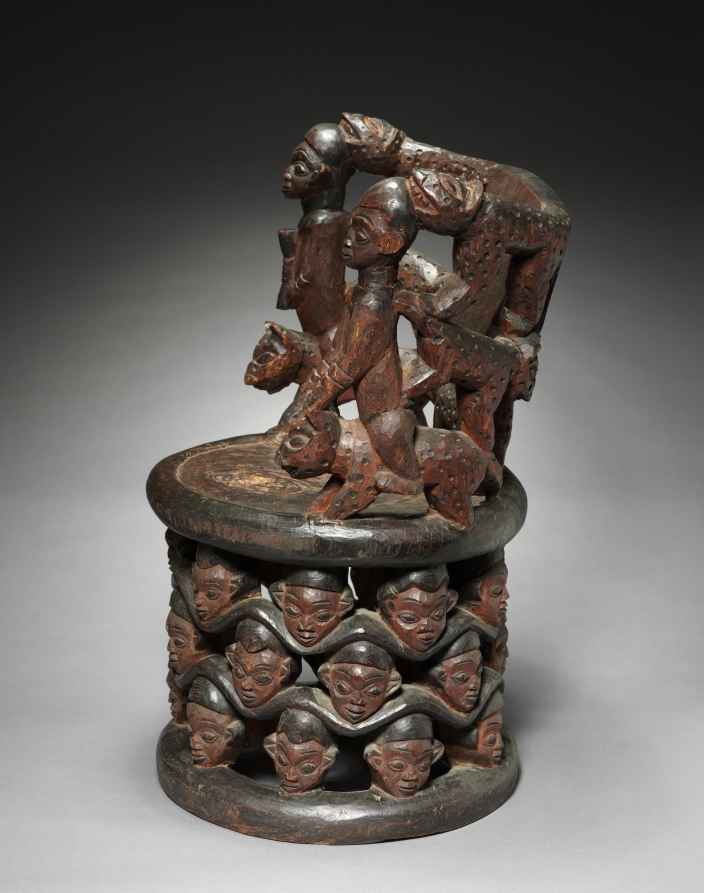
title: Prestige Chair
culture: Africa, Central Africa, Cameroon, Babanki-style maker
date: 1800s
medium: Wood and paint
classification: Furniture and woodwork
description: This stately chair attributed to the Babanki peoples of the Cameroon Grassfields features an unusual configuration of male and female figures. They are mounted on stylized leopards, animals revered as embodiments of power and royalty, which stand atop a base of three undulating rings bearing 24 heads. Chairs like this one serve as visual records that help mark kingships through the ages, conveying power and authority. The chair type was relatively common at the time; they were carved for sale to Europeans and local patrons, and also used as articles of royal gift exchange.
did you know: A British soldier acquired this work in Cameroon during the First World War.